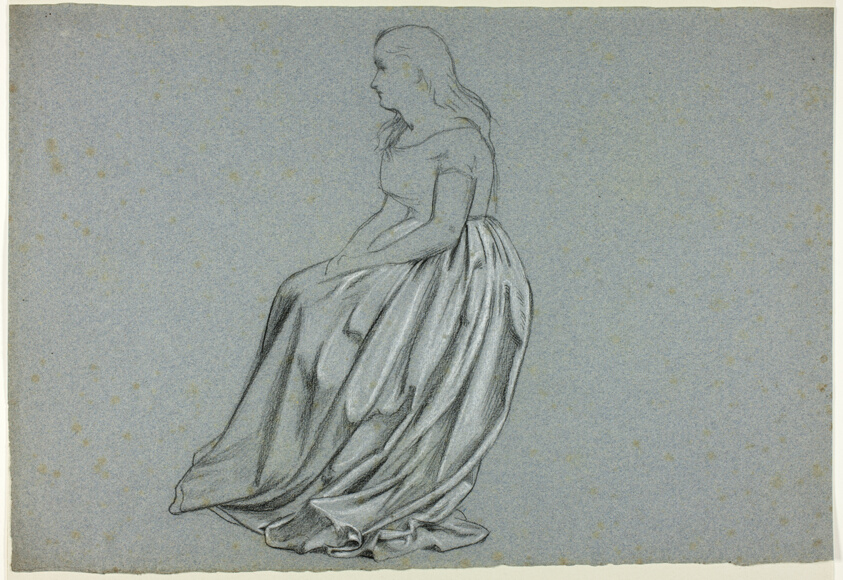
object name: Drawing and Watercolor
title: Profile of a Seated Woman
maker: Henry Stacy Marks (English, 1829-1898)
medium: Black pastel, heightened with white pastel, on blue laid paper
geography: England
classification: pastel; drawings (visual works); prints and drawing